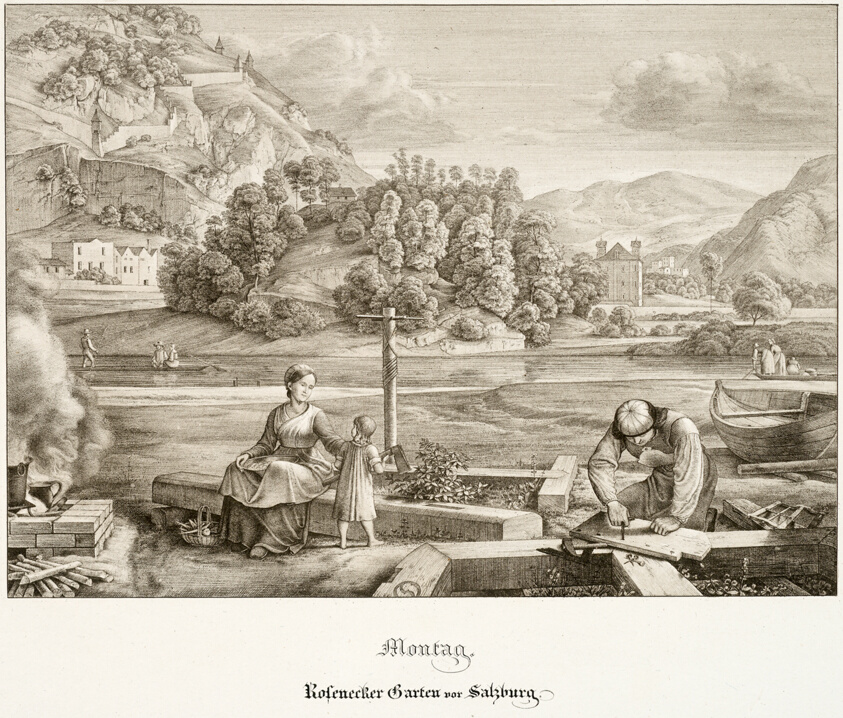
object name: Print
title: Monday: Rosenecker Garden before Salzburg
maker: Ferdinand Olivier (German, 1785-1841)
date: 1823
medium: Lithograph with tint-stone on white wove paper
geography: Germany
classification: lithograph; print; prints and drawing